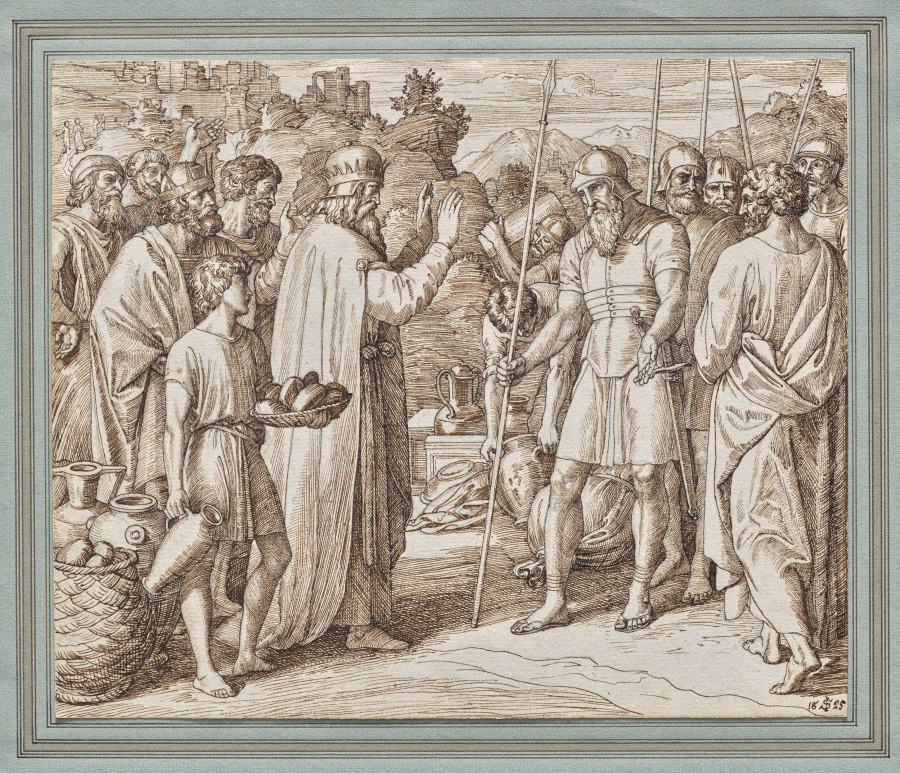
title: Melchizedek Blessing Abraham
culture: Germany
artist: Julius Schnorr von Carolsfeld (German, 1794–1872)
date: 1825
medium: pen and brown ink mounted on blue laid paper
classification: Drawing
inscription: Signed and dated, lower right, in brown ink: 18JS25; inscribed (in later hand in Sütterlin), lower right on mount, in graphite: Julius Schnorr von Carolsfeld 1794 – 1872. / “Abraham wird von Melchisidek gesegnet.” / (1. B. Mose 14, 18-20). [A. Schahl s. 137, nr. 25] / Feder in Braun, über Blei, 21,4 x 25, 6 cm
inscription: Collector's stamp (Walter Moraw): Sammlung MW (not in Lugt)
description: Julius Schnorr von Carolsfeld was an important figure within the Romantic movement that spread throughout Germany in the early 1800s. He was a member of the Nazarenes, a loosely formed group of young artists who rejected their conservative training in favor of a restrained style that they hoped would spiritually elevate those who viewed it. Schnorr von Carolsfeld is best known today for the Picture Bible, an expansive series of drawings created as illustrations for episodes from scripture. This drawing presents a scene from the Book of Genesis, evoking a dramatic episode with a restrained style characteristic of the Nazarenes’ work around this time.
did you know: The Picture Bible, the series to which this drawing belongs, was originally a group project conceived by Julius Schnorr von Carolsfeld and the Nazarenes, but he took over execution of the project around 1824.